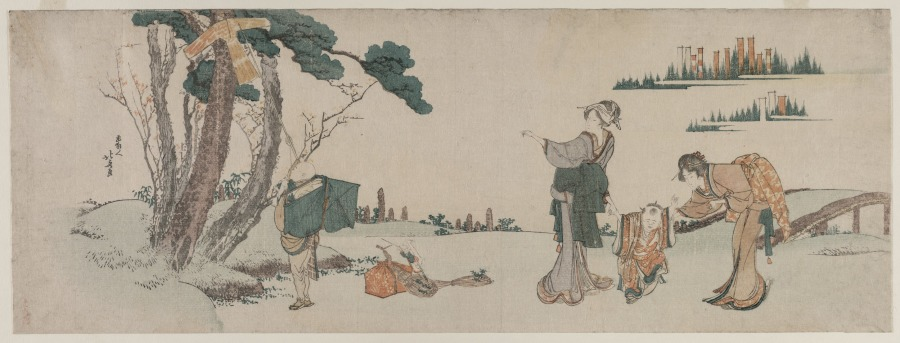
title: Women Distracting a Child whose Kite is caught in a Tree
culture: Japan, Edo period (1615–1868)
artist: Katsushika Hokusai (Japanese, 1760–1849)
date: c. 1800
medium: color woodblock print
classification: Print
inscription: Signature: Gakyokin Hokusai ga